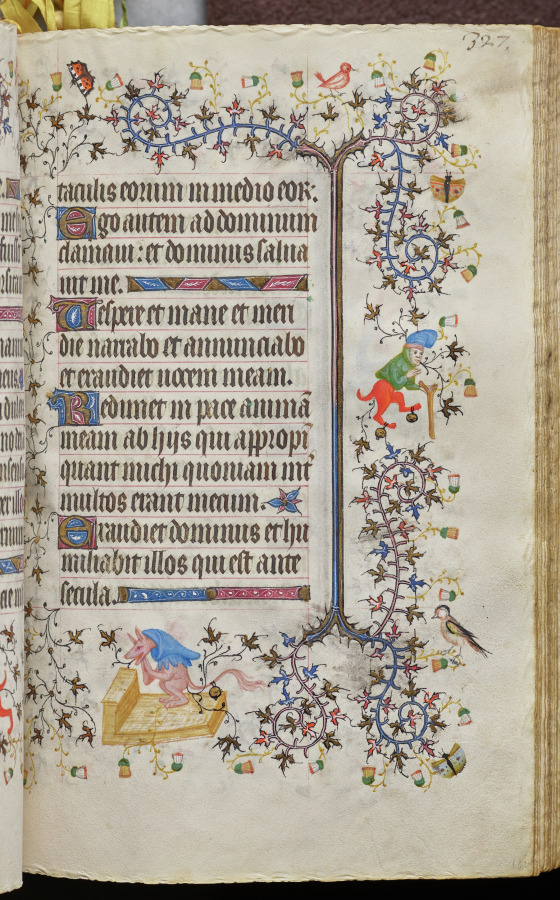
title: Hours of Charles the Noble, King of Navarre (1361-1425): fol. 164r, Text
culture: France, Paris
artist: Master of the Brussels Initials and Associates (French)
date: c. 1405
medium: ink, tempera, and gold on vellum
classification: Bound Volume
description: This precious volume was obviously highly prized by its owner, the French-born King of Navarre, who had his coat of arms painted on no less than twenty folios. Rather than directly commissioning this manuscript from a specific workshop, it seems that Charles the Noble acquired his book of hours -- perhaps ready-made for the luxury market -- while on a trip to Paris in 1404-05. A collaborative effort, six painting styles are evidenced within the pages of this codex, those of two Italians, two Frenchmen, and two Netherlanders. The painter who was responsible for the planning and decoration of the book, and who produced seventeen of the large miniatures, was a Bolognese artist known as the Master of the Brussels Initials. His principal assistant, responsible for most of the borders, was a Florentine who signed his name "Zecho" da Firenze on folio 208 verso.